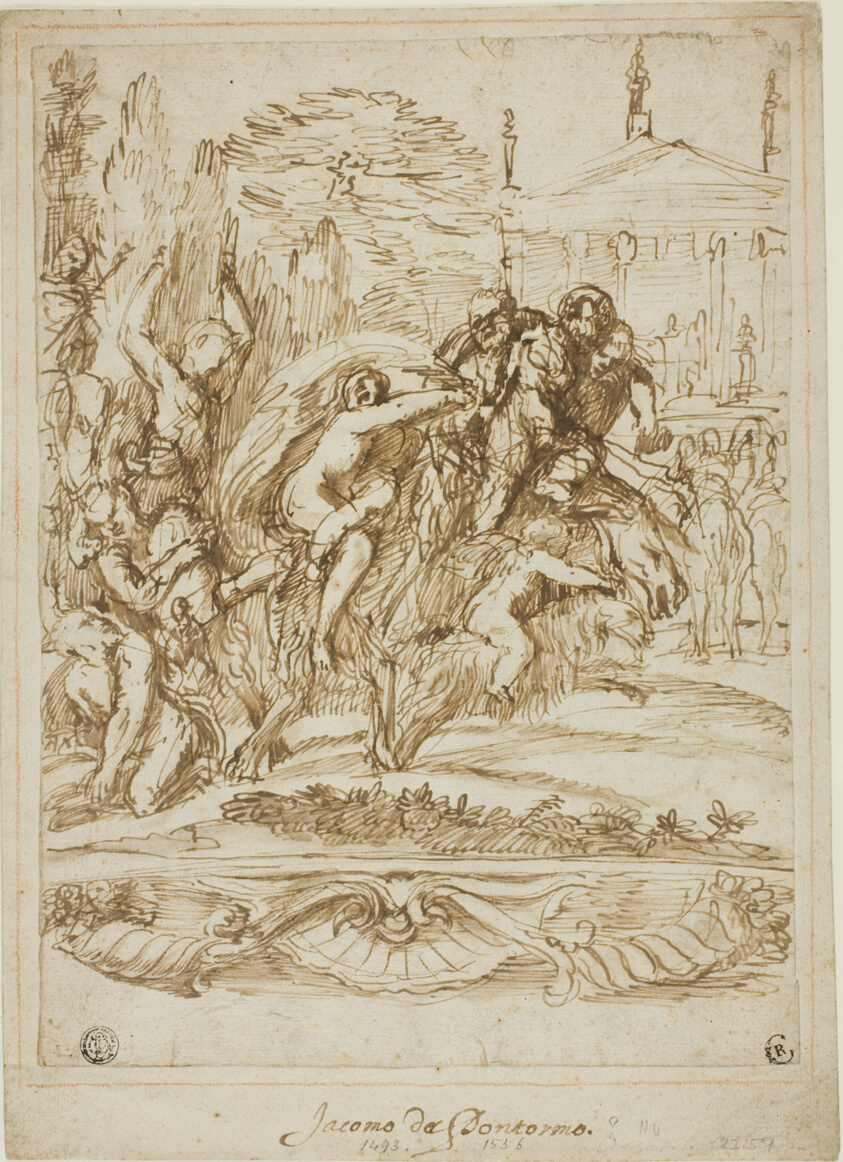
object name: Drawing and Watercolor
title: Bacchanal Scene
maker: Unknown Artist; Italian, 17th century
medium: Pen and brown ink, with brush and brown wash, on ivory laid paper, laid down on ivory laid paper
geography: Italy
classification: pen and ink drawings; drawings (visual works); prints and drawing